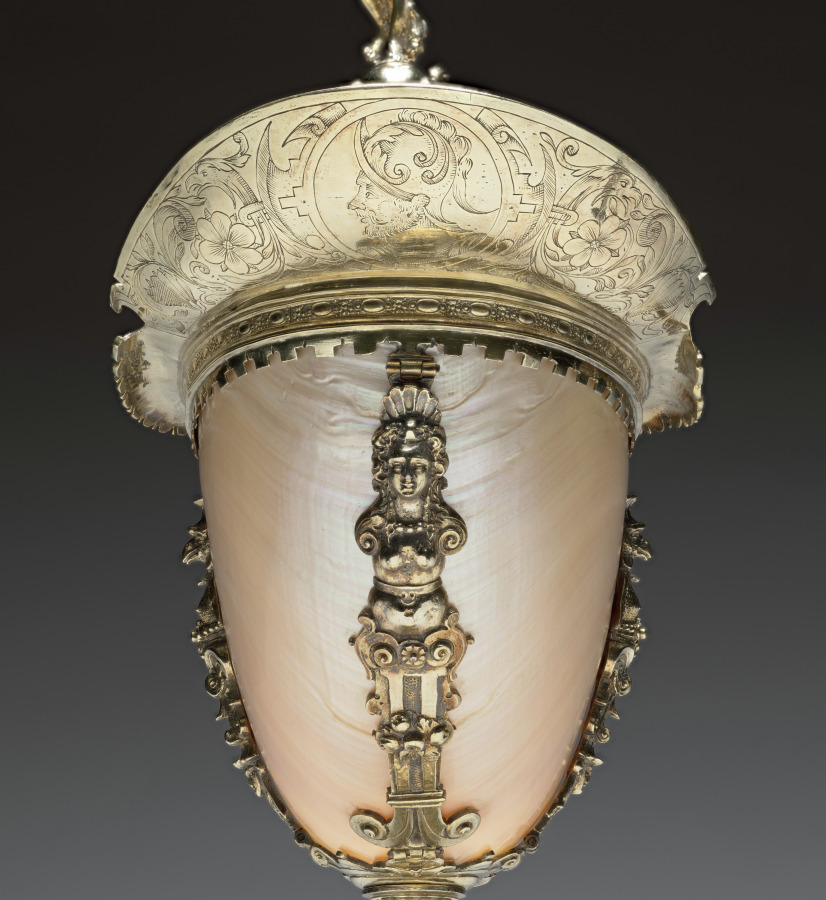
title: Nautilus Cup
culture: Netherlands, Holland, Delft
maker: Cornelis Jansz van der Burch (Dutch, active in Delft, d. 1615)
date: 1607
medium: Silver-gilt, nautilus shell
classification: Metalwork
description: Nautilus shells were brought to the Netherlands from Indonesia. Skilled Dutch silversmiths mounted them in silver, creating luxurious vessels that were sought after by wealthy collectors. Early Dutch nautilus cups are mainly associated with the city of Delft, although only a few other examples made in Delft are known from the late sixteenth and early seventeenth centuries. They feature the dramatic motif of a sea monster’s head.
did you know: The nautilus is a marine mollusk that swims by expelling water from its shell using jet propulsion.